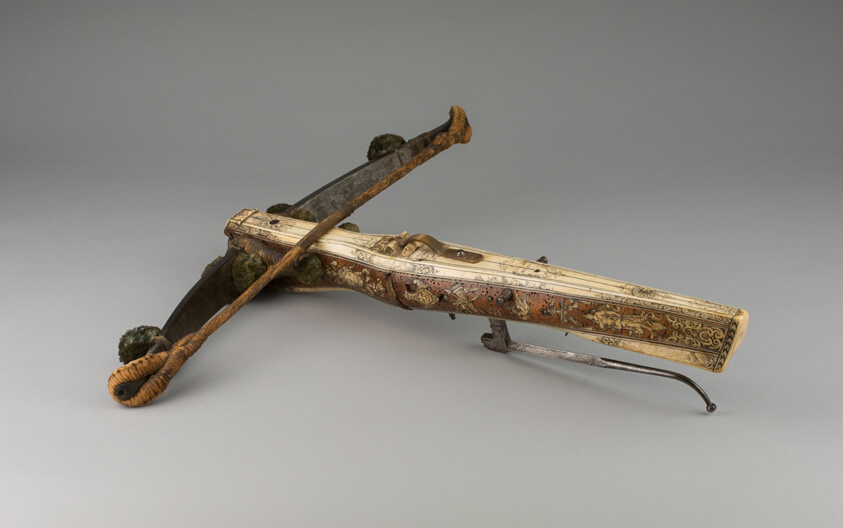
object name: Arms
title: Crossbow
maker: German, Dresden; Master I.G.H. (Johann Gottfried Hänisch the Elder)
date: 1732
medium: Steel, walnut, staghorn, bovine horn, bone, silk fiber, and hemp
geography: Dresden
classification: crossbow; arms; arms and armor